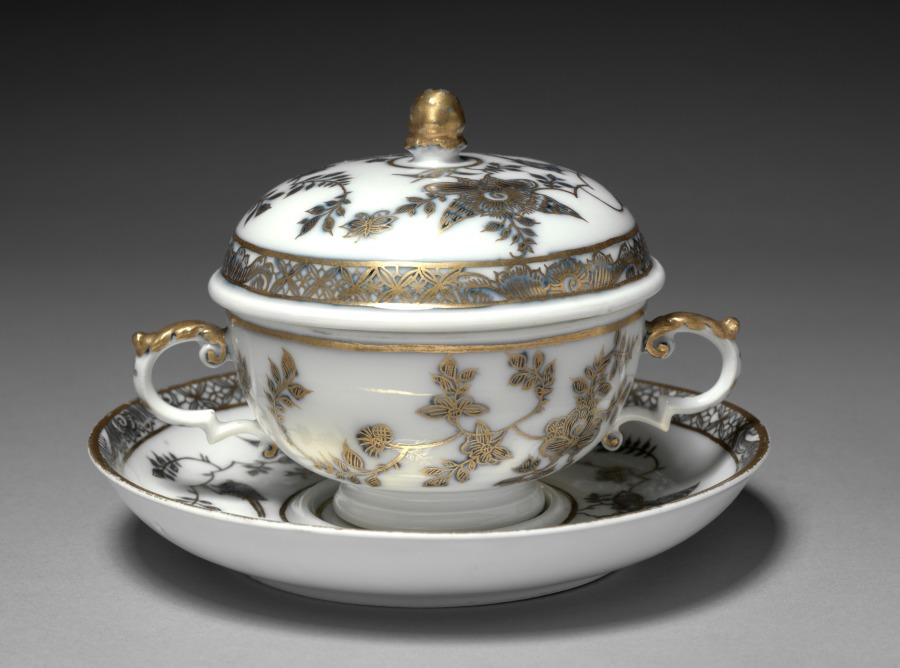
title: Covered Broth Bowl and Stand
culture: Germany, Meissen, 18th century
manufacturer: Meissen Porcelain Factory (German, est. c. 1710)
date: 1730–40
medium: gilt porcelain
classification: Ceramic